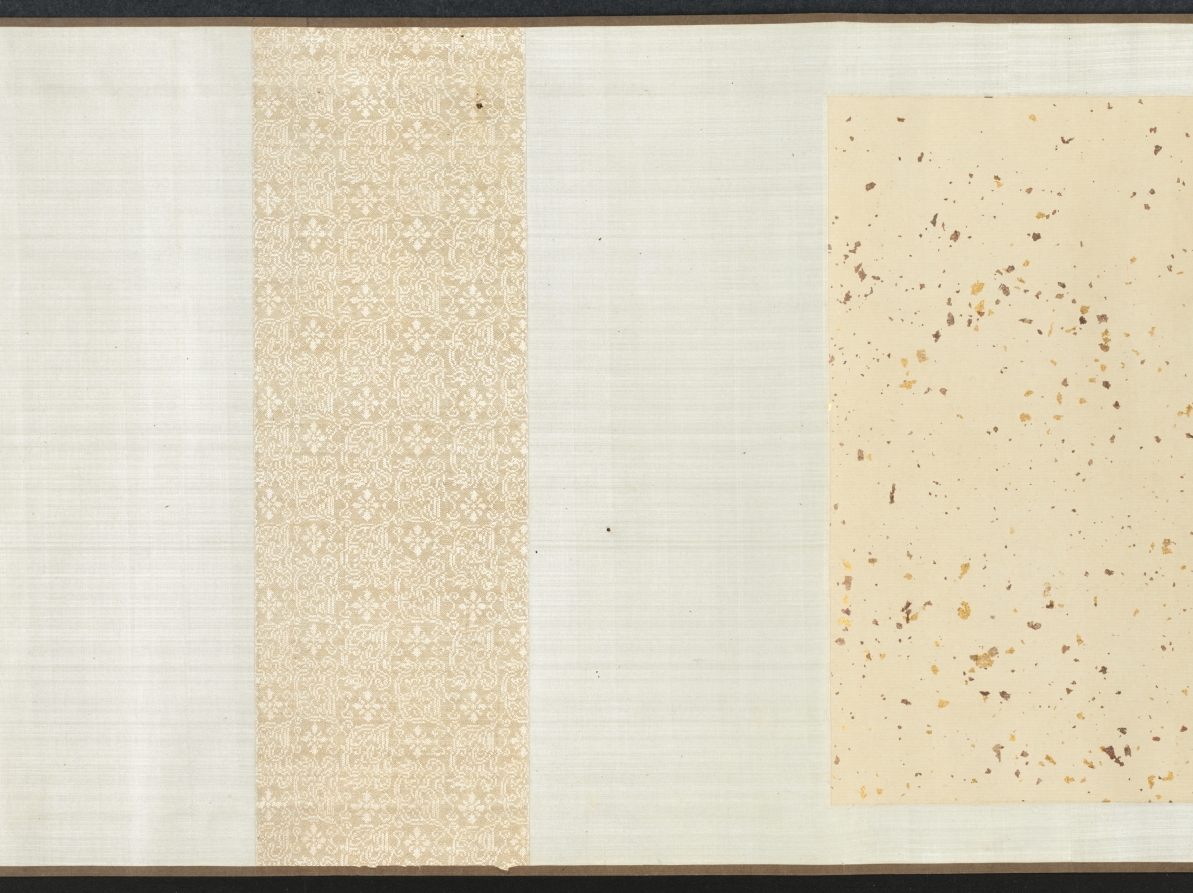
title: Ink Flowers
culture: China, Yuan dynasty (1271-1368)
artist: Zhao Zhong (Chinese, second half of the 1300s)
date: 1361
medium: Handscroll; ink on paper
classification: Painting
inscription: 寶帶同心結，香羅合歡扇。/ 繡作錦鴛鴦，雙雙為君獻。/ 薔薇露灑熏籠衣，馨香奉君君勿違。 原初并題。 [印] 趙衷原初畫記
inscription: 翠袂素羅韈，玉臺黃金盃。浩歌渡弱水。天風卷海三山開，麻姑方平為招飲，蛟宮獻舞銀濤堆。 原初并題。 [印] 雲林清趣、[印] 趙衷原初畫記。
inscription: 右用湯叔雅慶元中所寫墨花法作此卷，又效李長吉體賦詩以題之。詩與畫雖未工，要皆出於古人之餘，譬猶欲成方圓而必求其規矩之用也，識者毋誚焉！至正辛丑八月望日，東吳野人趙衷原初謹識。 [印] 趙原初、[印] 傳世清玩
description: Zhao Zhong's flowers, each paired with a poem, echo the fine-style colored flowers of the academic tradition, but instead he used only ink. Fine lines define the contours of each plant, as well as the veins within each petal and leaf. Careful ink washes give subtle modeling to the forms. The combination of lily, narcissus, and peony is unusual as the three belong to no known seasonal or symbolic system popular in the fourteenth century. Zhao’s medical training may have influenced the selection. Powdered lilies, for example, were prescribed to dispel grief, while the bark of tree peony roots was used as a treatment for various blood disorders.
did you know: This handscroll is a very rare example of ink flowers in the linear baimiao style of the fourteenth century.